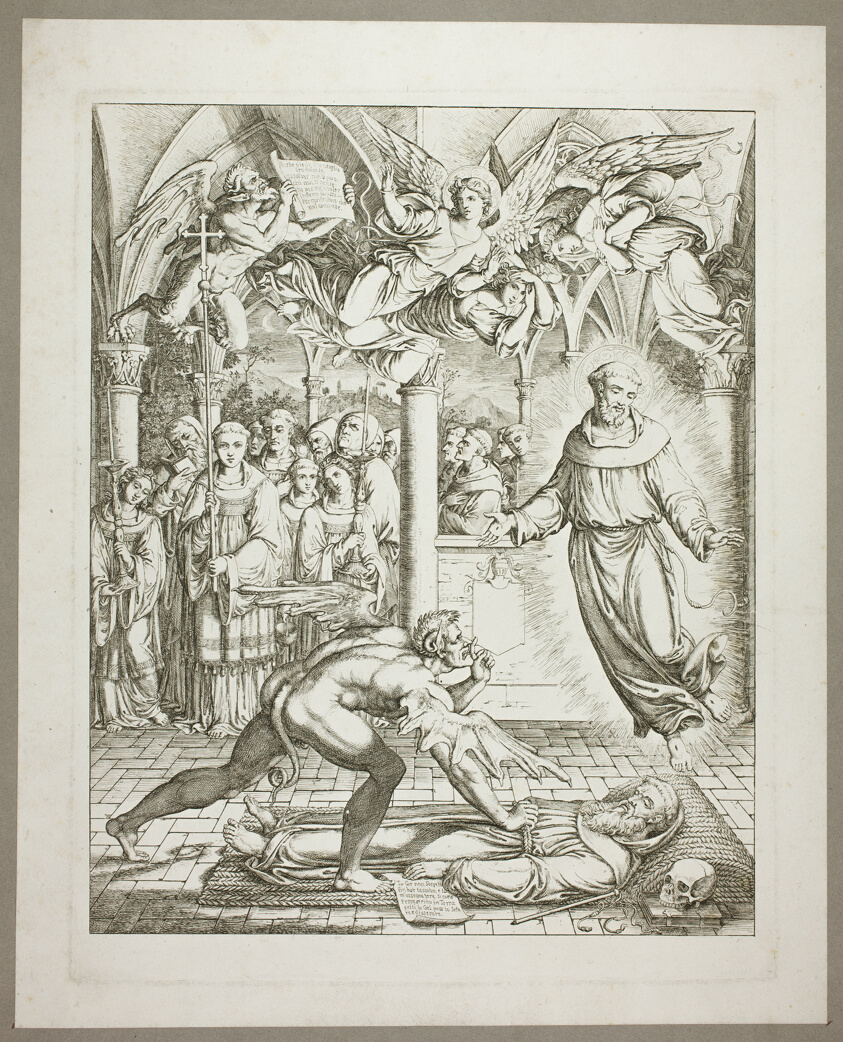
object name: Print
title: The Struggle Between the Devil and St Francis of Assisi for the Soul of Guido da Montefeltro, plate three from Darstellungen aus Dante's Hölle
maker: Joseph Anton Koch (German, 1768-1839)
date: 1807/08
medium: Etching on paper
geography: Germany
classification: etching; print; prints and drawing